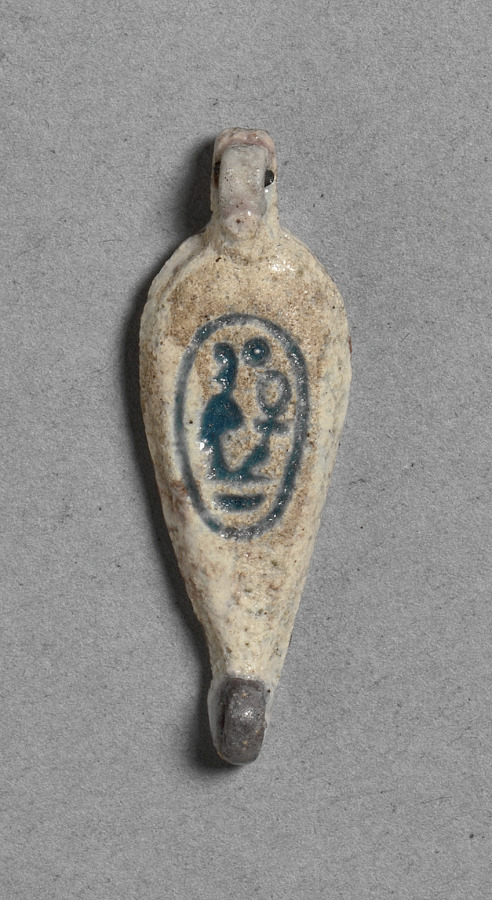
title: Petal-Shaped Bead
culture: Egypt, New Kingdom (1540–1069 BCE), Dynasty 18, reign of Amenhotep III (1390–1352 BCE)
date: c. 1391–1353 BCE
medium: faience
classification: Jewelry